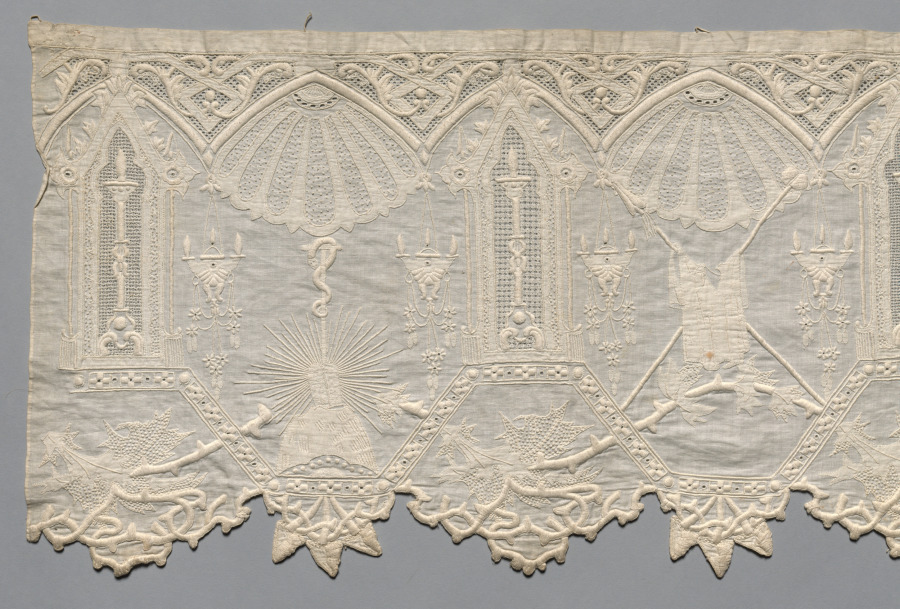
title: Altar Cloth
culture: Italy(?)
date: 1800s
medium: Plain weave cotton: needle lace (drawnwork), appliqué, and embroidery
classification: Embroidery